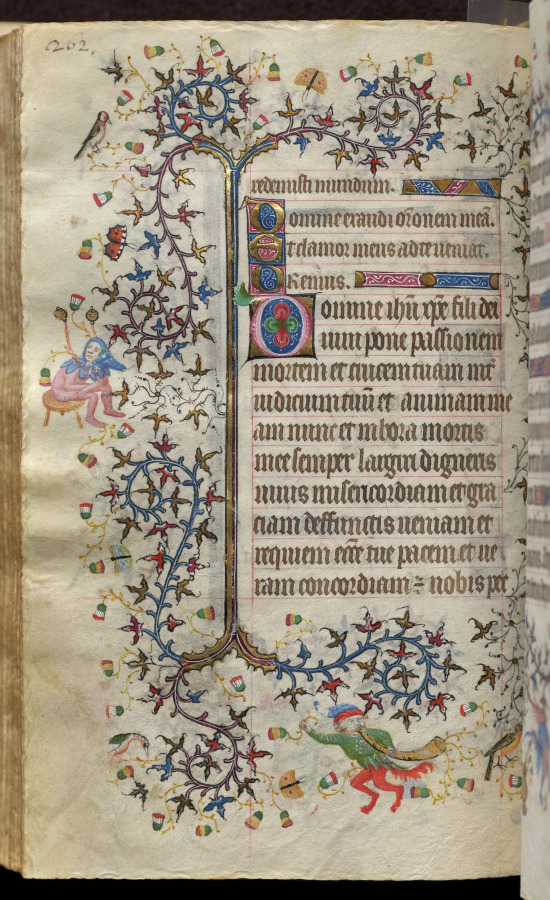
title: Hours of Charles the Noble, King of Navarre (1361-1425): fol. 131vr, Text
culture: France, Paris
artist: Master of the Brussels Initials and Associates (French)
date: c. 1405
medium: ink, tempera, and gold on vellum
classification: Bound Volume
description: This precious volume was obviously highly prized by its owner, the French-born King of Navarre, who had his coat of arms painted on no less than twenty folios. Rather than directly commissioning this manuscript from a specific workshop, it seems that Charles the Noble acquired his book of hours -- perhaps ready-made for the luxury market -- while on a trip to Paris in 1404-05. A collaborative effort, six painting styles are evidenced within the pages of this codex, those of two Italians, two Frenchmen, and two Netherlanders. The painter who was responsible for the planning and decoration of the book, and who produced seventeen of the large miniatures, was a Bolognese artist known as the Master of the Brussels Initials. His principal assistant, responsible for most of the borders, was a Florentine who signed his name "Zecho" da Firenze on folio 208 verso.